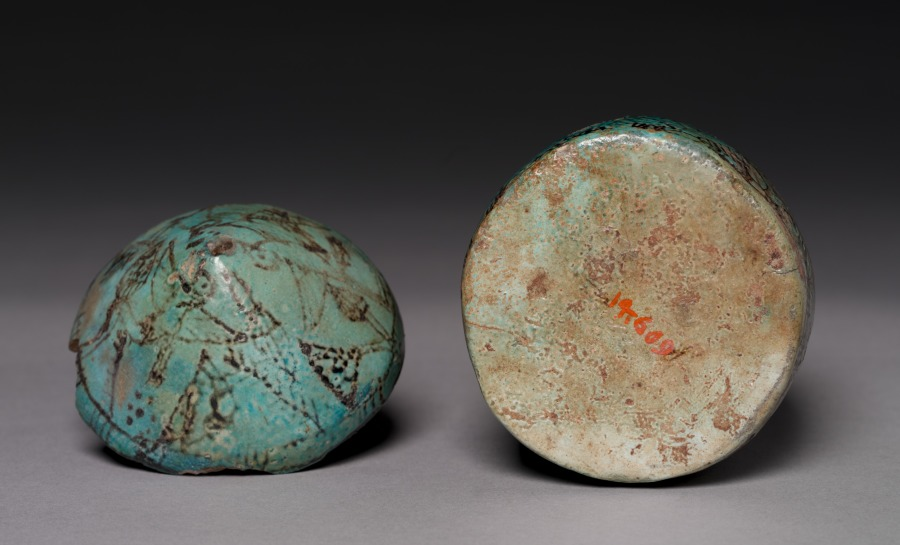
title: Pyxis with Lid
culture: Egypt, Middle Kingdom (2040–1648 BCE)–New Kingdom (1540–1069 BCE)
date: c. 1901–1525 BCE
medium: turquoise faience with black decoration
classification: Vessels